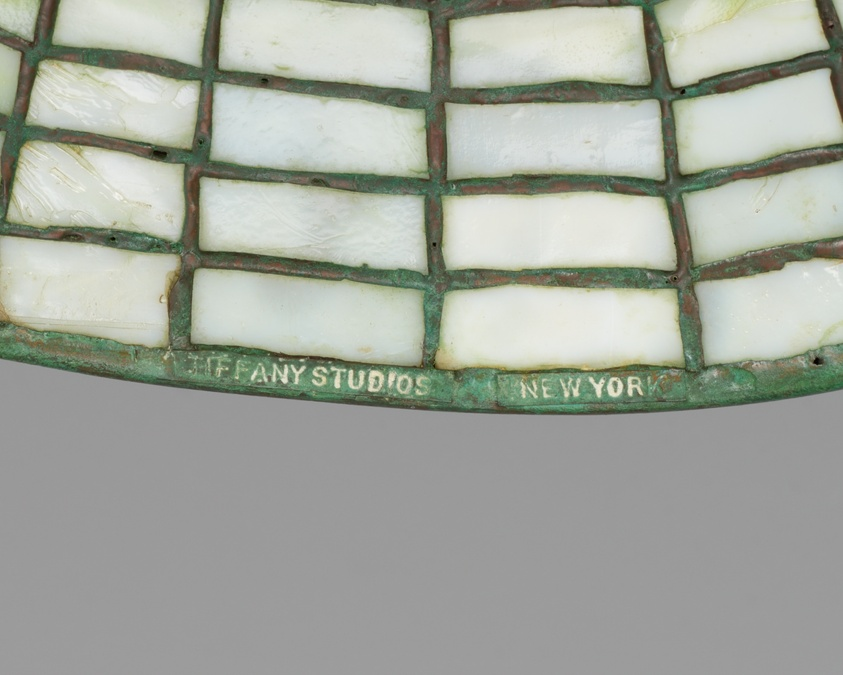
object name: Furnishings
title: Lamp with “Heavy Ribs” Shade and “Bat” Base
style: Arts and Crafts Movement, 20th Century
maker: Tiffany Studios (American, 1902–32); Corona, New York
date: c. 1905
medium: Favrile glass, leaded glass, and bronze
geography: Corona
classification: lamp (lighting device); american decorative arts; decorative arts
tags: bats, mosaic, spiders, spiderwebs